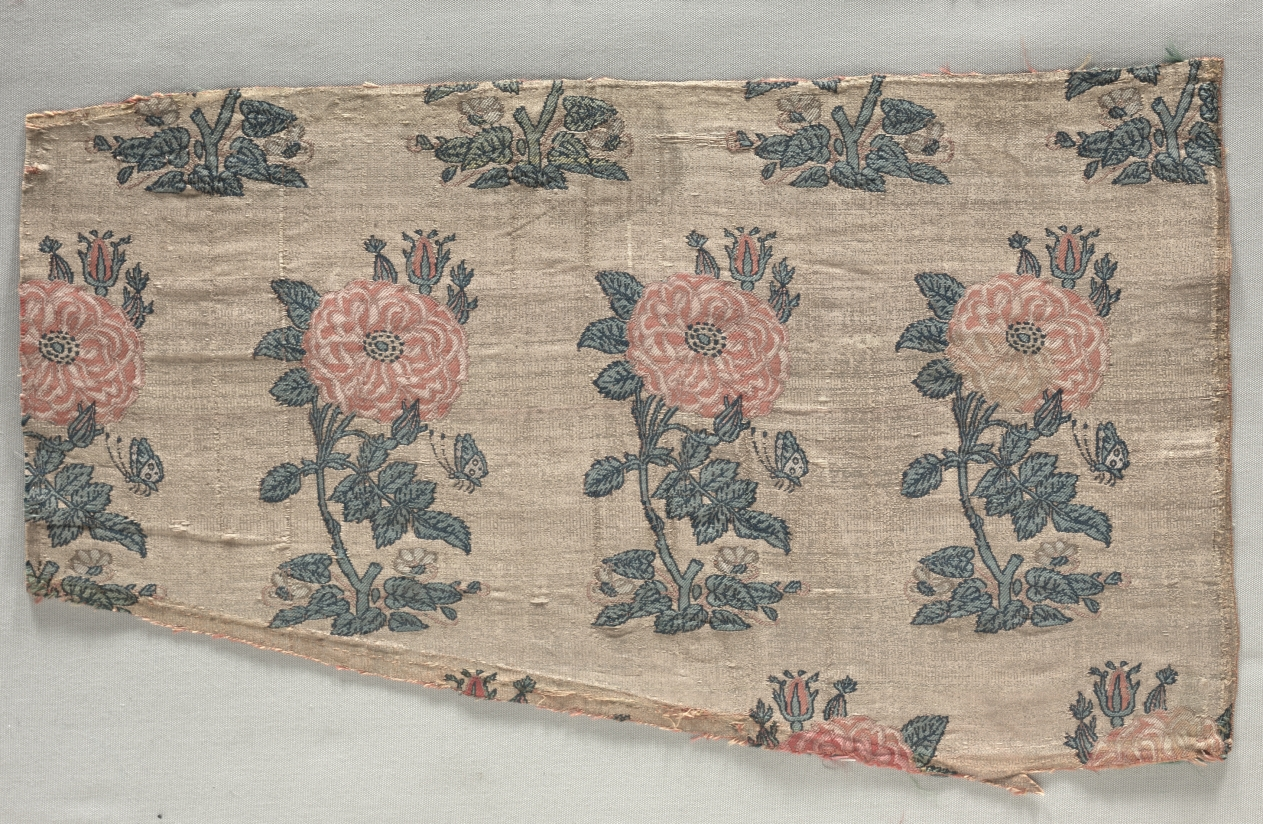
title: Sleeve with rose bushes and butterflies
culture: Iran, reign of Shah Abbas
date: early 1600s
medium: compound tabby ground with diasper pattern, brocaded; silk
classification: Textile